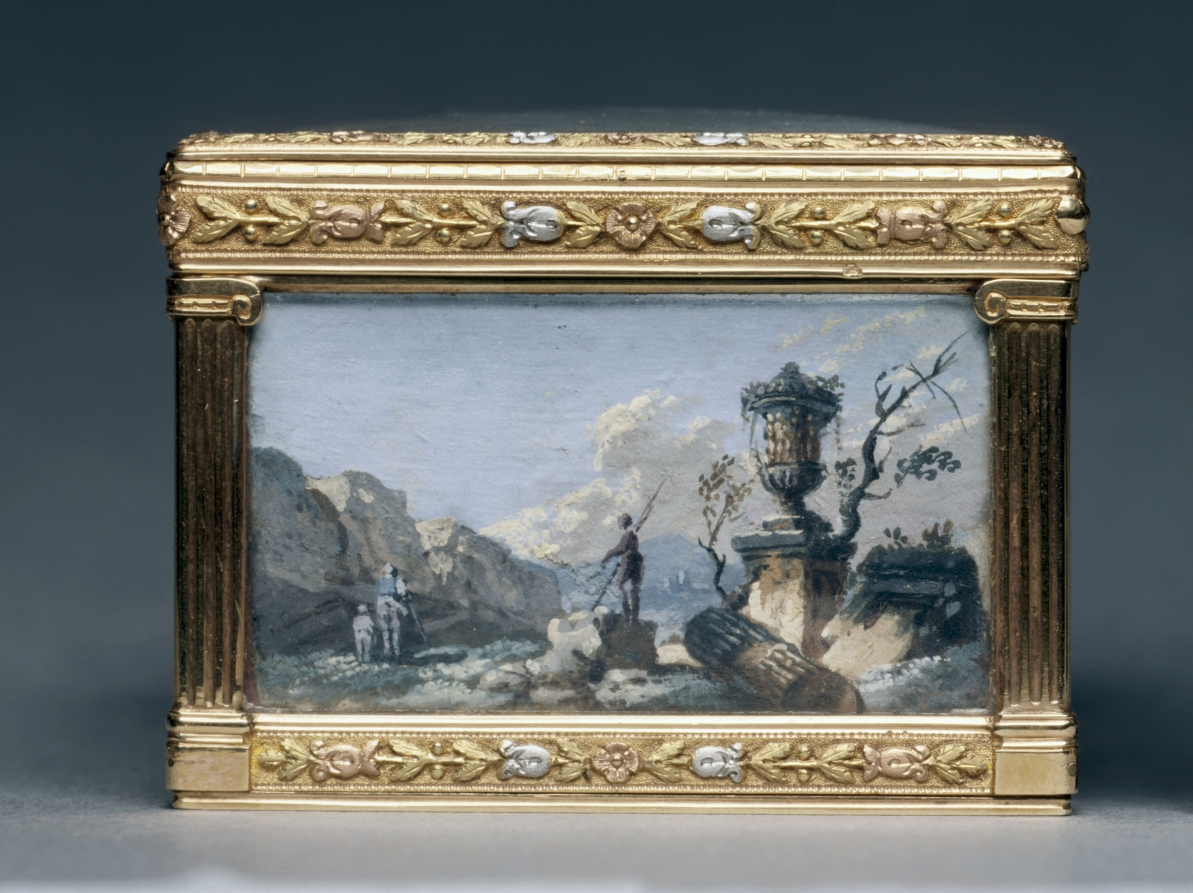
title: Rectangular Box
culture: France, 19th century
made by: Alexandre Leferre (French)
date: c. 1840–1850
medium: gouache miniatures mounted on gold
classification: Miscellaneous